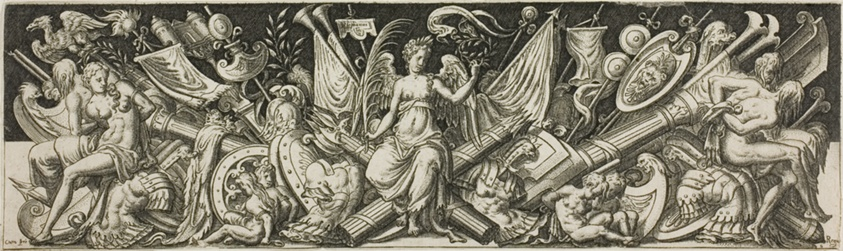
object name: Print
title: Combats and Triumphs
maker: Etienne Delaune; French, c. 1519-1583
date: 1550/1572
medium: Engraving on paper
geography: France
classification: engraving; print; prints and drawing